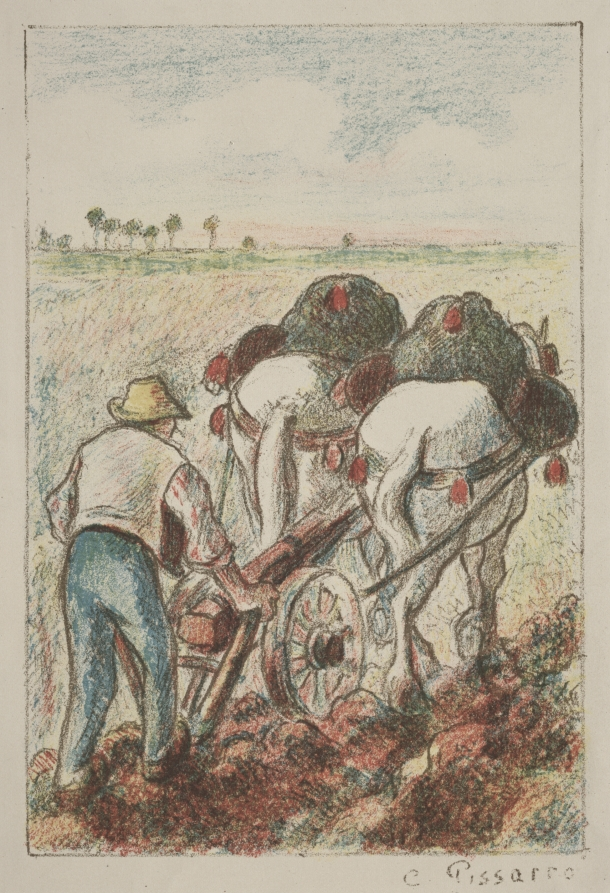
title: The Plow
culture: France, early 20th Century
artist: Camille Pissarro (French, 1830–1903)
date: 1901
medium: Color lithograph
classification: Print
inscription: Signed, lower right, in stone: C. Pissarro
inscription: Blindstamp: ED SAGOT / Editeur / PARIS [Lugt 2254]